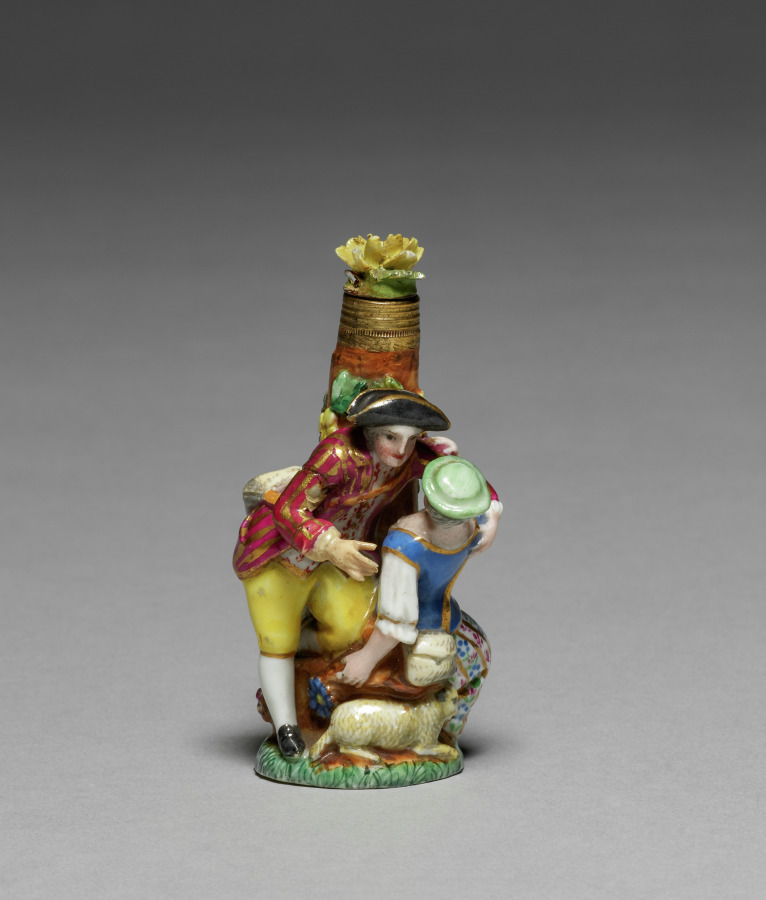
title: Scent Bottle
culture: Germany, Meissen, 19th century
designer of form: manner of Meissen Porcelain Factory (German, est. c. 1710)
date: 1800s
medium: porcelain with gilt metal mounts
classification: Miscellaneous